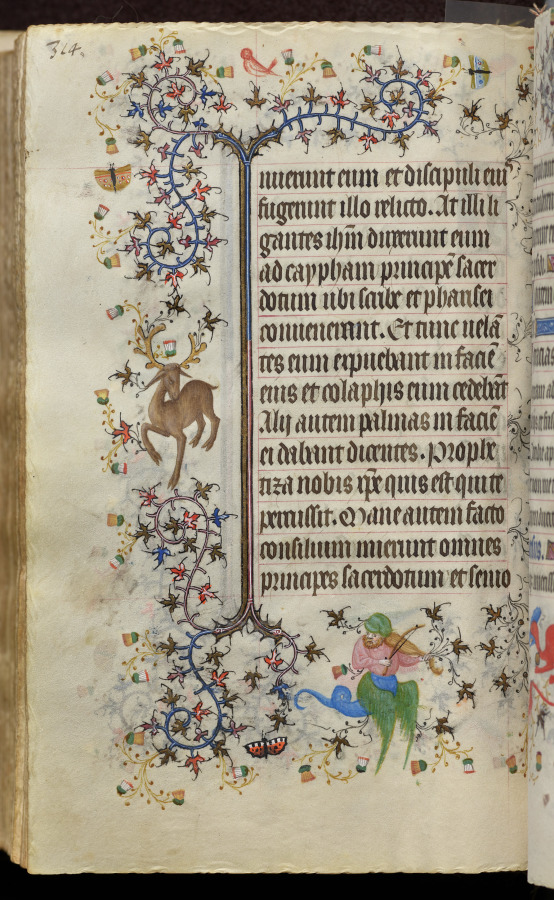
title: Hours of Charles the Noble, King of Navarre (1361-1425): fol. 157v, Text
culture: France, Paris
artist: Master of the Brussels Initials and Associates (French)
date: c. 1405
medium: ink, tempera, and gold on vellum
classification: Bound Volume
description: This precious volume was obviously highly prized by its owner, the French-born King of Navarre, who had his coat of arms painted on no less than twenty folios. Rather than directly commissioning this manuscript from a specific workshop, it seems that Charles the Noble acquired his book of hours -- perhaps ready-made for the luxury market -- while on a trip to Paris in 1404-05. A collaborative effort, six painting styles are evidenced within the pages of this codex, those of two Italians, two Frenchmen, and two Netherlanders. The painter who was responsible for the planning and decoration of the book, and who produced seventeen of the large miniatures, was a Bolognese artist known as the Master of the Brussels Initials. His principal assistant, responsible for most of the borders, was a Florentine who signed his name "Zecho" da Firenze on folio 208 verso.